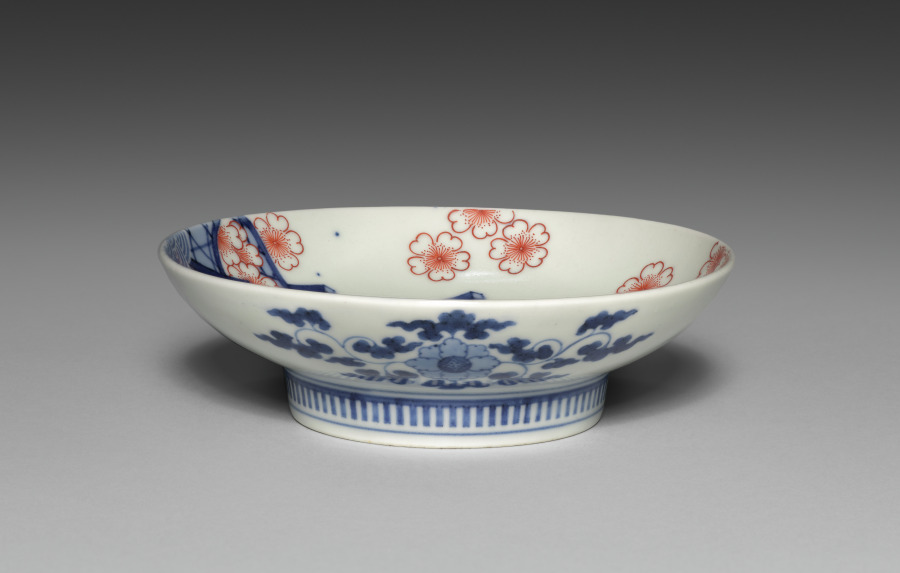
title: Small Dish (Kozara) with Cherry Blossoms in Baskets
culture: Japan, Edo period (1615–1868)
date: c. 1670‒1710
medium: Porcelain with underglaze blue and overglaze color enamel (Hizen ware, Nabeshima type)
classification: Ceramic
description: The cherry blossoms and stylized wave pattern that appear on this dish remain popular today.